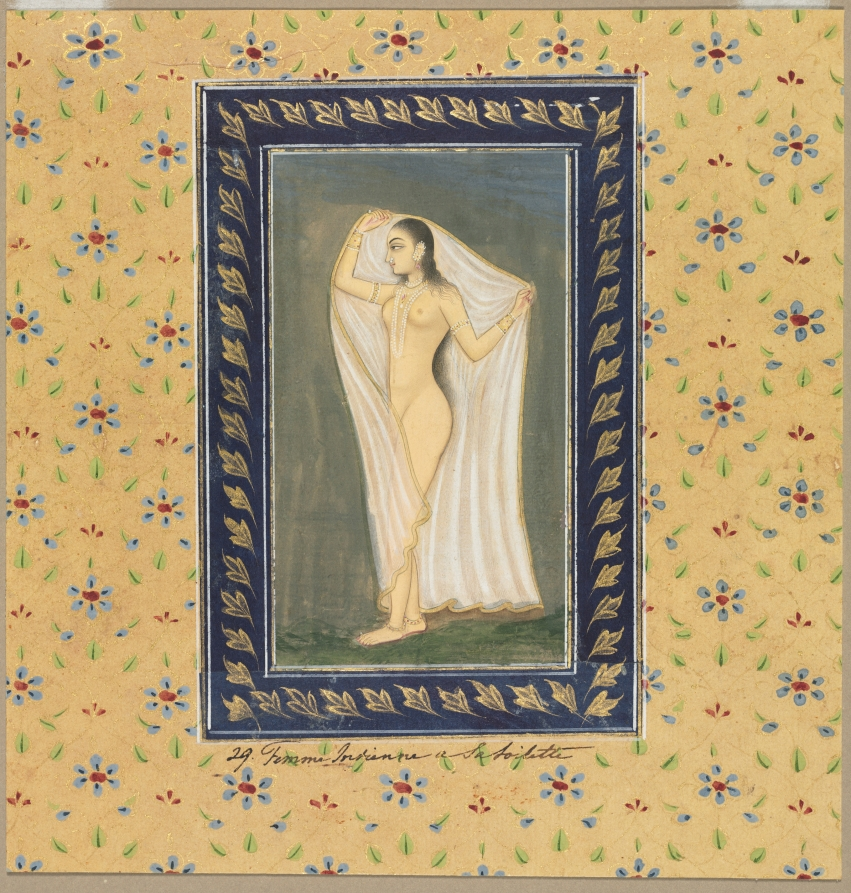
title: Lady after a Bath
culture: India, Mughal, 18th century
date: 1700s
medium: gum tempera and gold on paper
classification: Painting